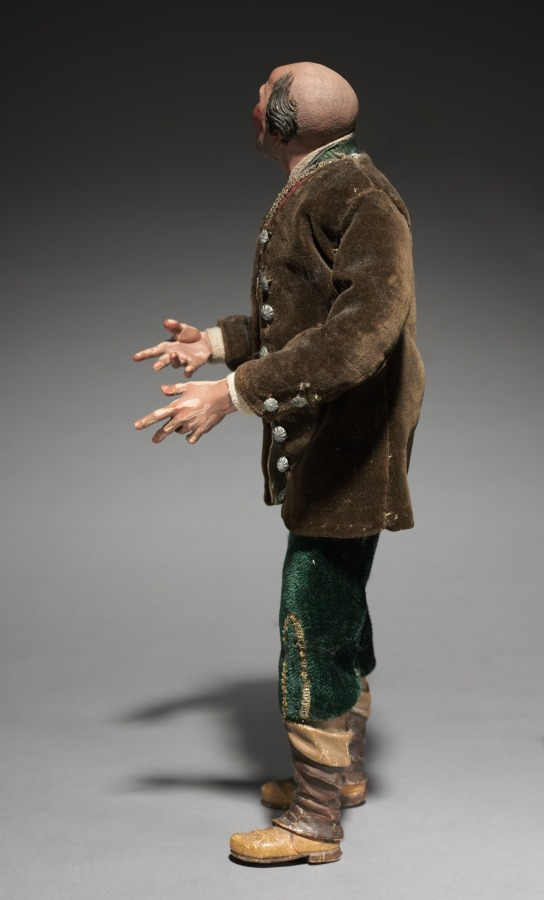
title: Figure from a Crèche: Standing Man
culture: Italy, Naples, late 18th-early 19th century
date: 1780–1830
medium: painted wood and terracotta with various textiles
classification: Sculpture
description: The practice of creating scenes of the Nativity for the home dates from the early 1700s in Italy, where people began to set up doll-like figures of about a foot or less in height. The custom was particularly popular in Naples around 1800, where crèche scenes (crèche means cradle, or crib) included many figures, whose heads and hands of painted terracotta, stuffed cloth bodies, and clothing adapted from contemporary local costumes gave them an amazingly realistic character. Representations of the birth of Jesus can be traced to the first few centuries of Christianity. Both living creatures and sculptural depictions of them were used from early times. By the late middle ages it was customary to create life-size figures of wood or stone, naturalistically painted, to represent the characters who participated in the events of Jesus's early life. These sculptures were then arranged in scenes illustrating one or both of the most important of these events, the Adoration of the Shepherds and the Adoration of the Magi-the three kings from the East who came to pay homage to the Christ child. Used in churches, these large figures were especially popular in Italy, Central Europe, Spain, and Portugal.